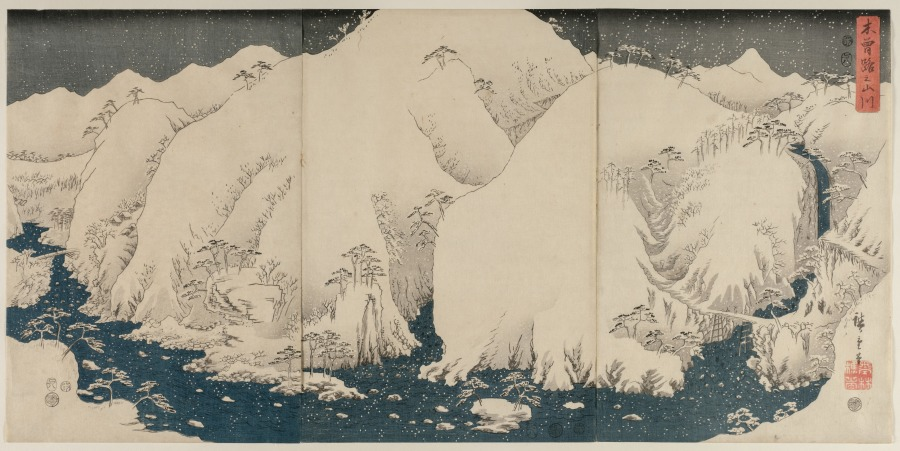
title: Mountain and River on the Kiso Road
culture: Japan, Edo period (1615–1868)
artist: Utagawa Hiroshige (Japanese, 1797–1858)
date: 1857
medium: Triptych of color woodblock prints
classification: Print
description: Late in his career, Hiroshige explored the poetic theme of setsugekka, “snow, moon, and flowers,” in a set of three triptychs. This panoramic scene features a river passing snow-covered mountains along the Kiso Road.